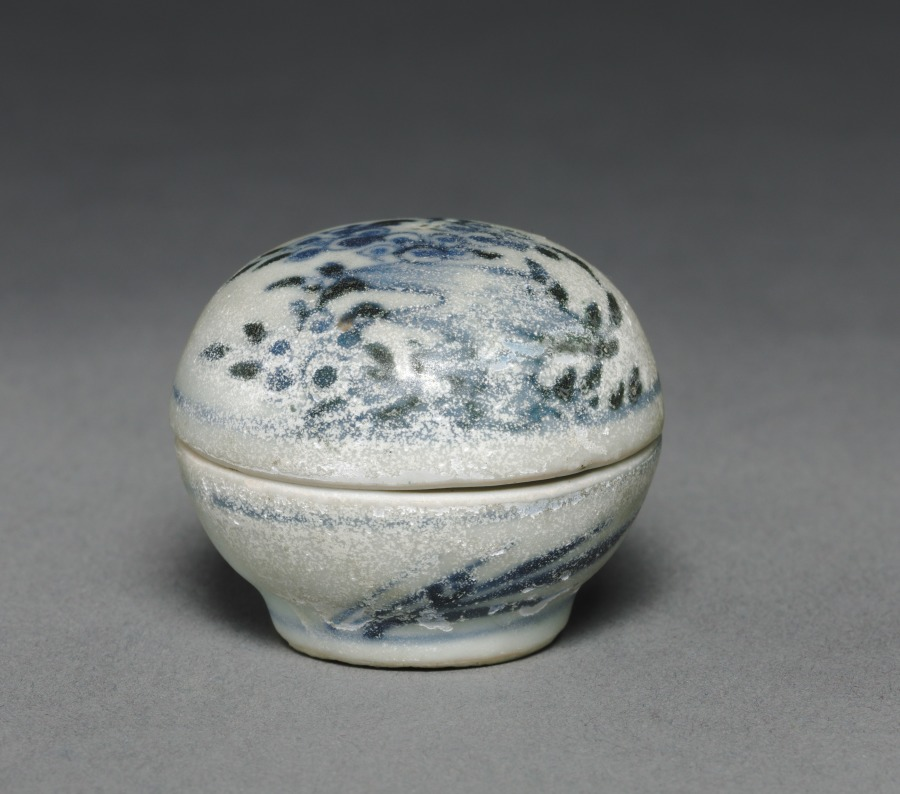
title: Pill Box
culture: China, Qing dynasty (1644-1911)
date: c. 1752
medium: porcelain with blue and white decoration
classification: Ceramic